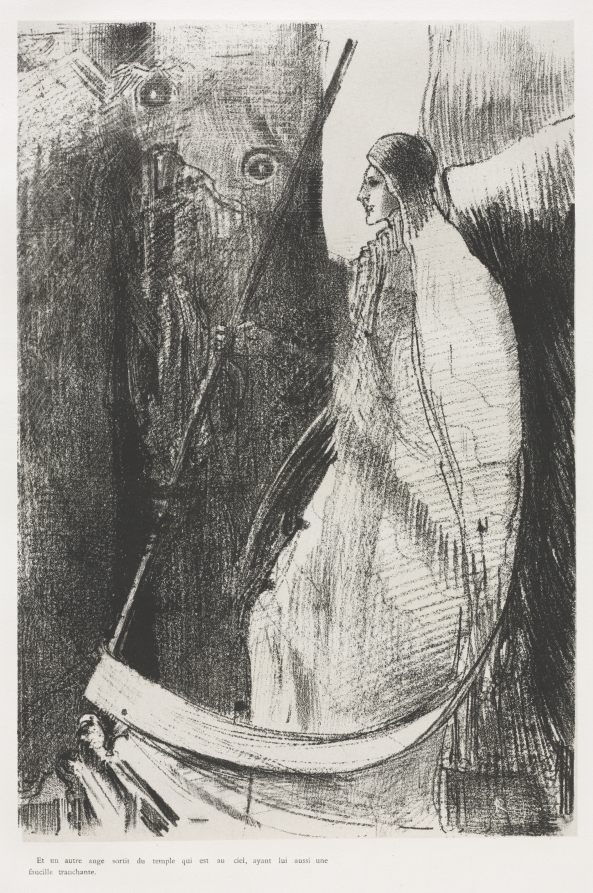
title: And Another Angel Came Out of the Temple which is in Heaven, and He also Having a Sharp Sickle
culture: France, late 19th Century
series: The Apocalypse of Saint John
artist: Odilon Redon (French, 1840–1916)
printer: Blanchard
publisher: Ambroise Vollard (French, 1867–1939)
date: 1899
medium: lithograph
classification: Print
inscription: initialed on stone at lower right: OR; printed at lower left, below image: Et un autre ange sortit du temple qui est au ciel, ayant lui aussi une / faucille tranchante.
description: The last of Odilon Redon’s 11 lithographic portfolios, this series relates to the Book of Revelation from the Christian Bible. The subject had been explored throughout art history, allowing the artist to align himself with past masters, such as Albrecht Dürer. Although Redon often vaguely referenced texts, these prints directly illustrate 12 individual passages, including one about a woman clothed with the sun and another focused on a great star falling from heaven. By the time he created this portfolio, Redon’s reputation was well established. The project was published by art dealer Ambroise Vollard, who began to sell and promote Redon’s work about a year earlier, building a market for his prints in Paris and abroad.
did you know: This is one of the last works where Redon experimented with lithograph and all-black medium. In contrast, bright, dazzling colors characterize his late works.